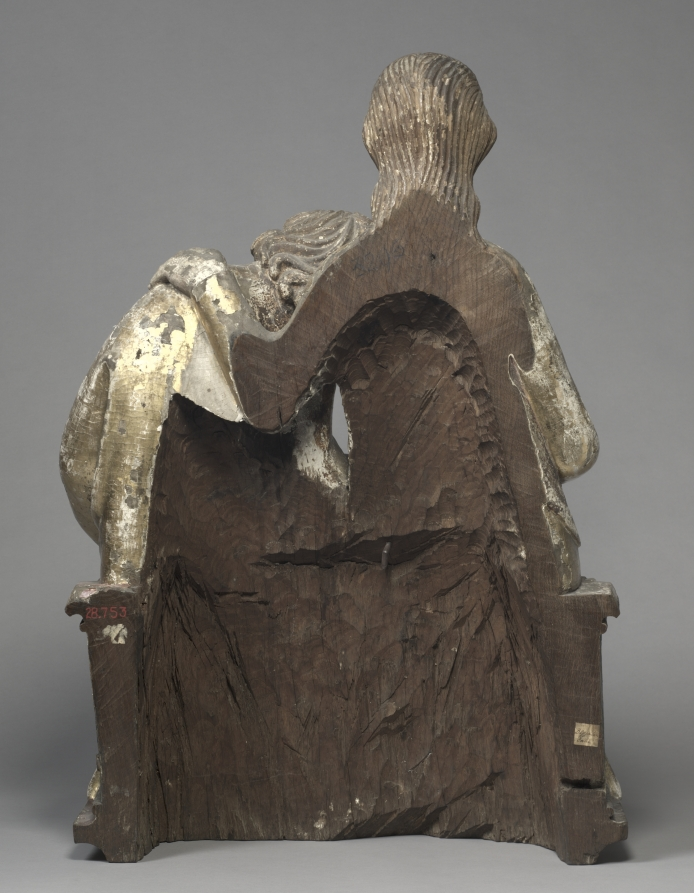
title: Christ and Saint John the Evangelist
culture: Germany, Swabia, near Bodensee (Lake Constance)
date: 1300–1320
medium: polychromed and gilded oak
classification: Sculpture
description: This sculptural group featuring Saint John the Evangelist resting on the shoulder of Christ was a prolific subject in Swabia, the region on the Swiss border. The subject appears to be unique to this region, where it became popular in the years following 1300. Many of these devotional sculptures adorned the chapels of Dominican convents; this is artistically among the finest to survive. It captures the pathos of the moment, based on the Gospel of John (13:23), which states that during the Last Supper one of Christ’s disciples, namely "whom Jesus loved," was resting on his shoulder. As a focus for devotion and contemplation, this sculpture reflects the fundamental religious beliefs rooted in the mysticism that dominated the period. Mysticism was a movement that intended to stimulate the contemplation of Christ’s Passion and suffering. Mysticism encouraged private devotion and religious images, called andachtsbilder (devotional images), appeared in large numbers in late medieval Germany.